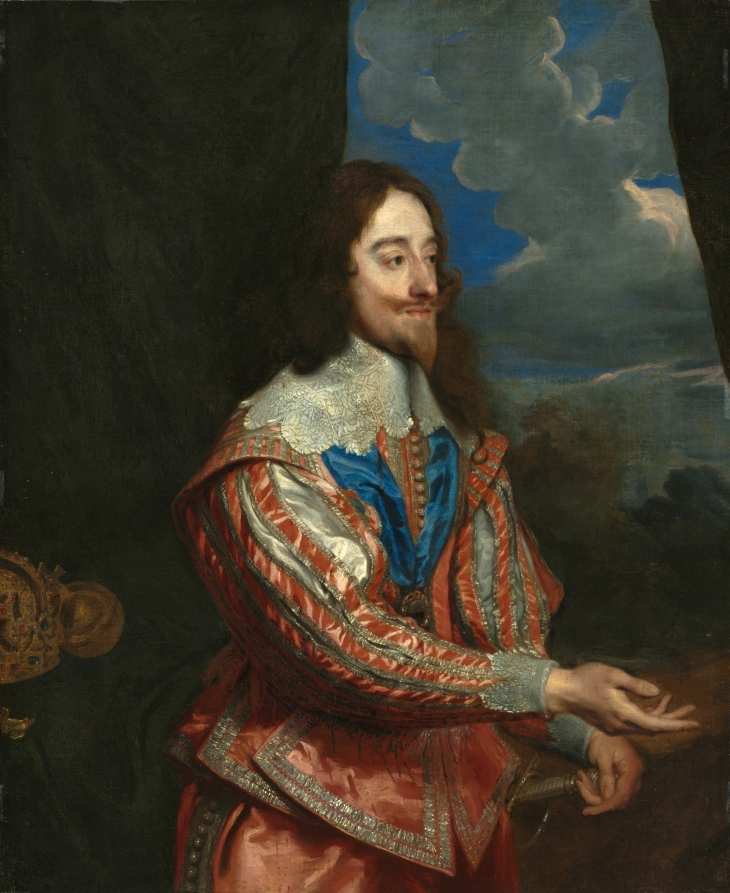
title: Portrait of Charles I (1600–1649)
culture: Flanders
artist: copy after Anthony van Dyck (Flemish, 1599–1641)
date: 1600s or later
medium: oil on canvas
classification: Painting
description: This is a fragment of a copy of van Dyck's portrait of 1632. Originally a double portrait, the painting would have included Charles I's wife, Queen Henrietta-Maria. An avid art collector, Charles I lured many important artists, including van Dyck and Rubens, from the Continent to England. Charles I was beheaded in 1649; however, the monarchy was later restored in 1660 by his son, Charles II.